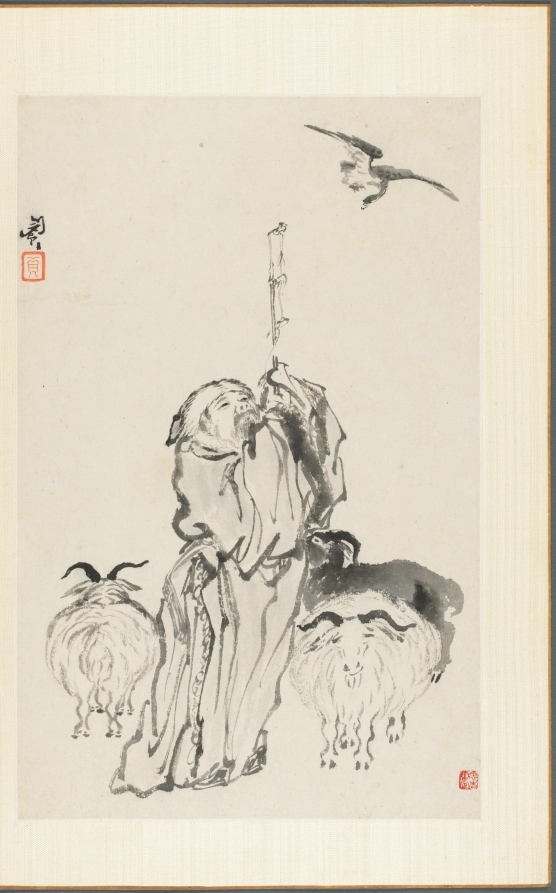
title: Su Wu the Shepherd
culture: China, Qing dynasty (1644-1911)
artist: Min Zhen (Chinese, 1730–after 1788)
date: 1788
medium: album leaf, ink on paper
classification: Painting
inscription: Inscription by Min Chen on the last leaf: I have a habit of collecting strange rocks. My friend Tai-li shan-jen* treasures my paintings as much as I treasure strange rocks. Once we agreed to exchange what we love with each other. However, my busy activities have kept me from carrying this out. This summer I realized that this strange rock has been sitting in my studio for five years, so I painted this to fulfill my old promise. As a record, I chose the grotesque cliff in the last scene of this twelve-leaf album. Cheng-chai, Min Chen inscribed this on the sixth day of the sixth month [July 9] of the wu-shen year [1788]. * Tai-li shan-jen is Wang Li [tzu: Li-fu] tr. Hou-mei Ishida Six seals appearing on the leaves: Min Chen, Cheng-chai, Ching-ch'iao, Chen, Liao-t'ang, Min Chen chih-yin.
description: Min Zhen, who was orphaned at age 12 and developed an eccentric personality, was trained by Tang Yin (1682–1756), a writer, playwright, and superintendent of the imperial porcelain workshops in Jingdezhen. The connection to him may have enabled Min to stay in Beijing for a decade from around 1773. It is not clear whether he ever resided in Yangzhou, but his style is in many instances reminiscent of that of Yangzhou artist Huang Shen. This album demonstrates Min’s versatility and mature style in the last years of his life.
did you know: Su Wu 蘇武 (140-60 BC) endured hardships and became a humble shepherd in an alien land while remaining a loyal servitor of the Han dynasty.